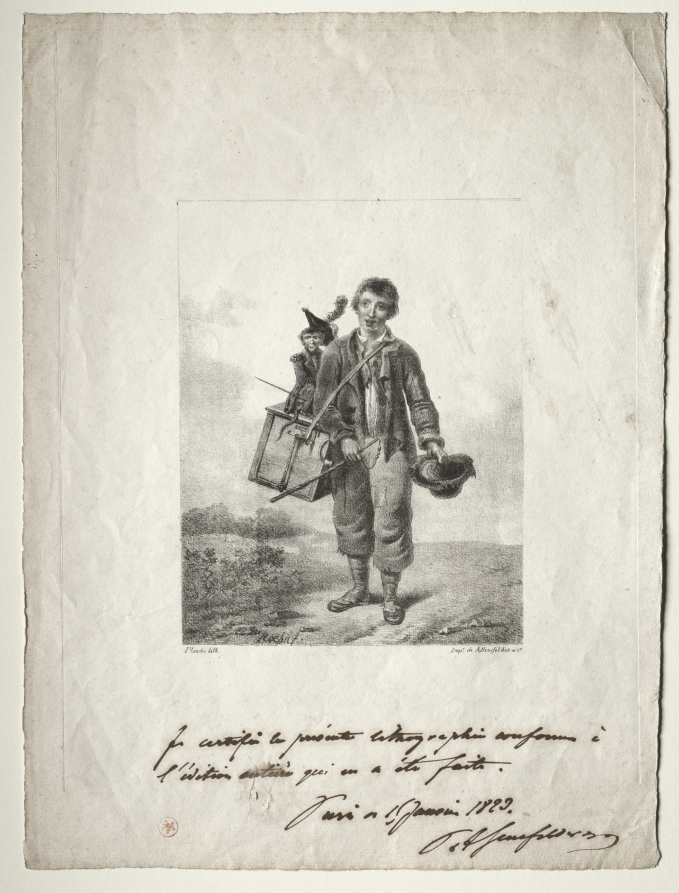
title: Organ-Grinder Boy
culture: Germany, 19th century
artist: Alois Senefelder (German, 1771–1834)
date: 1829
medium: lithograph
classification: Print